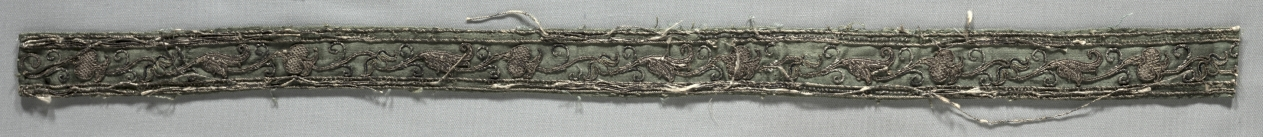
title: Apparel from a Dalmatic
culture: Italy, early 16th century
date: early 1500s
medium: embroidery; silk and metallic threads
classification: Embroidery